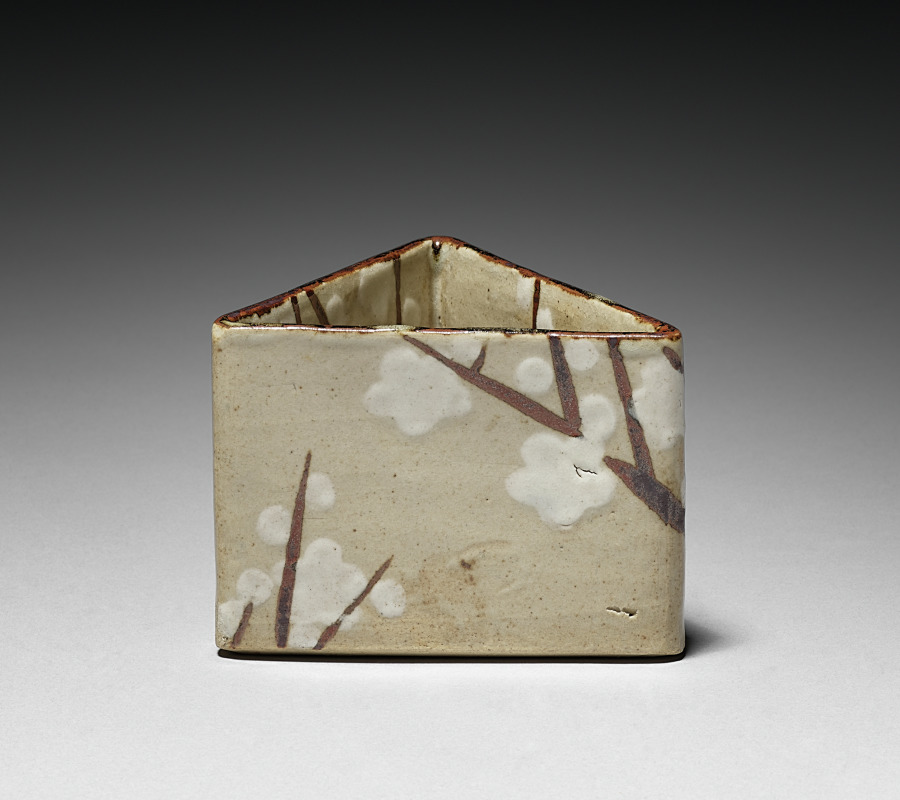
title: One of Five Serving Bowls (Mukozuke) with Prunus Design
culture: Japan, Edo period (1615–1868)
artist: school of Ogata Kenzan (Japanese, 1663–1743)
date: 1700s to mid-1800s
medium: Kyoto Ware: stoneware with underglaze iron oxide and slip decoration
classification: Ceramic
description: Note the rough, tan, clay bodies of these bowls with their deliberate irregularities. The design of branches was first painted in a black iron oxide, then the blossoms and buds in a white slip, followed by the application of a very thin transparent overglaze.